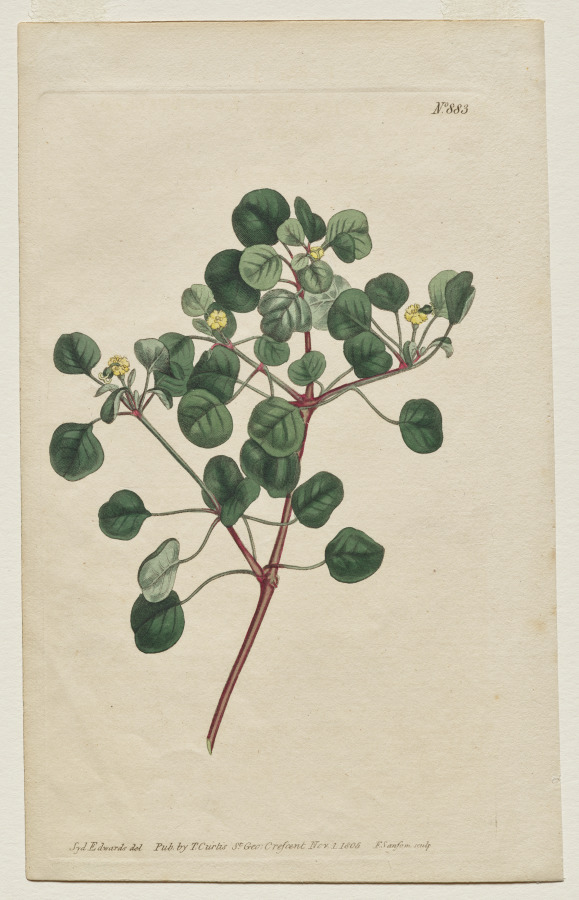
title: The Botanical Magazine or Flower Garden Displayed: Plate 883, Euphorbia Petiolaris. Long -Stalked Spurge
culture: England, 19th century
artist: Francis Sansom (British, 1815)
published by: Thomas Curtis (British, 1846–1920)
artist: after Sydenham Edwards (British, 1768–1819)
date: 1805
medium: engraving with hand coloring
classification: Print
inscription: upper right corner, engraved: No. 883 lower margin, engraved: Syd. Edwards del. Pub. By T. Curtis, St. Geo. Crescent Nov. 1, 1805 F. Sansom sculp.